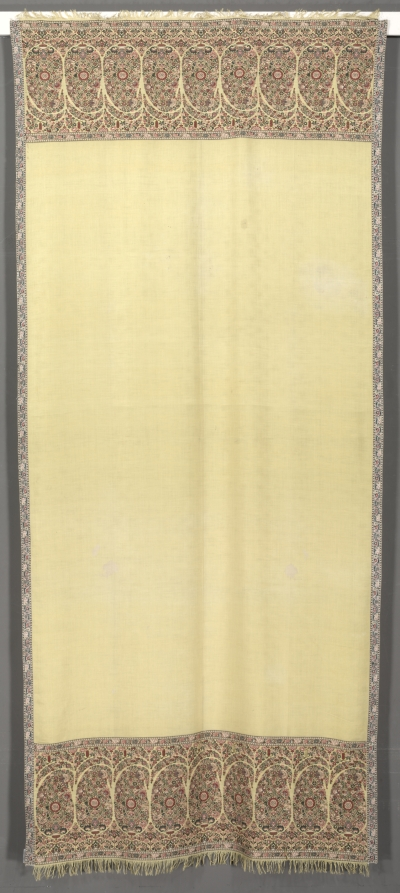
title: Long Shawl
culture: France?, 19th century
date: before 1815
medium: 2/2 twill weave ground with supplementary weft pattern in 3/1 (Z) weave twill; silk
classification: Textile